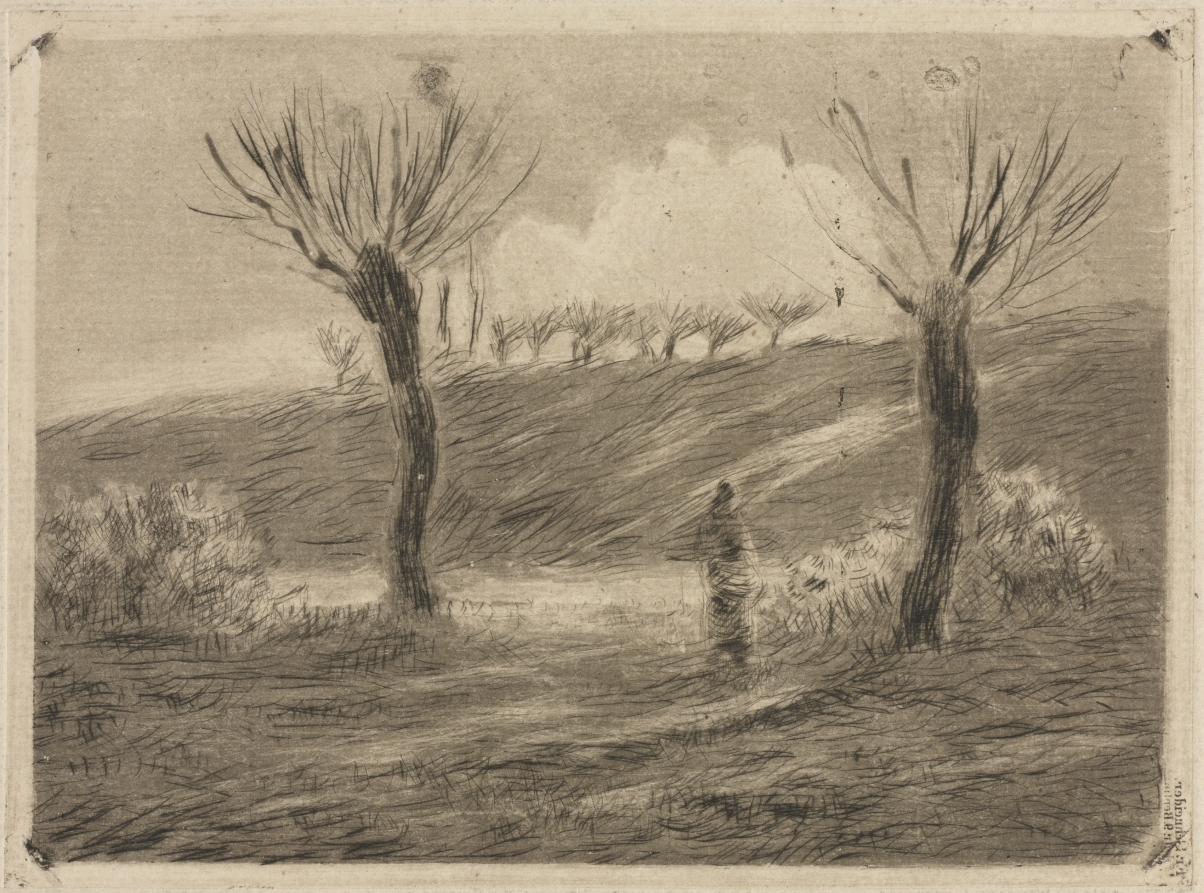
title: Setting Sun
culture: France, 19th century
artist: Camille Pissarro (French, 1830–1903)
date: 1879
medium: drypoint and aquatint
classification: Print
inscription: Inscribed, lower right margin, in graphite: No 6 / Soleil couchant / Epreuve d’artiste; signed, lower right margin, in graphite: C. Pissarro; inscribed, lower right, in graphite: à remettre [illegible] Ricketts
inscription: Plate hallmark, lower right corner: F. Schneider / [Linkstrauße] 9, Berlin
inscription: Collector's Mark, stamped, lower left, in black: A.B.S [Lugt 83b]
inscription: Watermark: VAN GELDER [ZONEN]